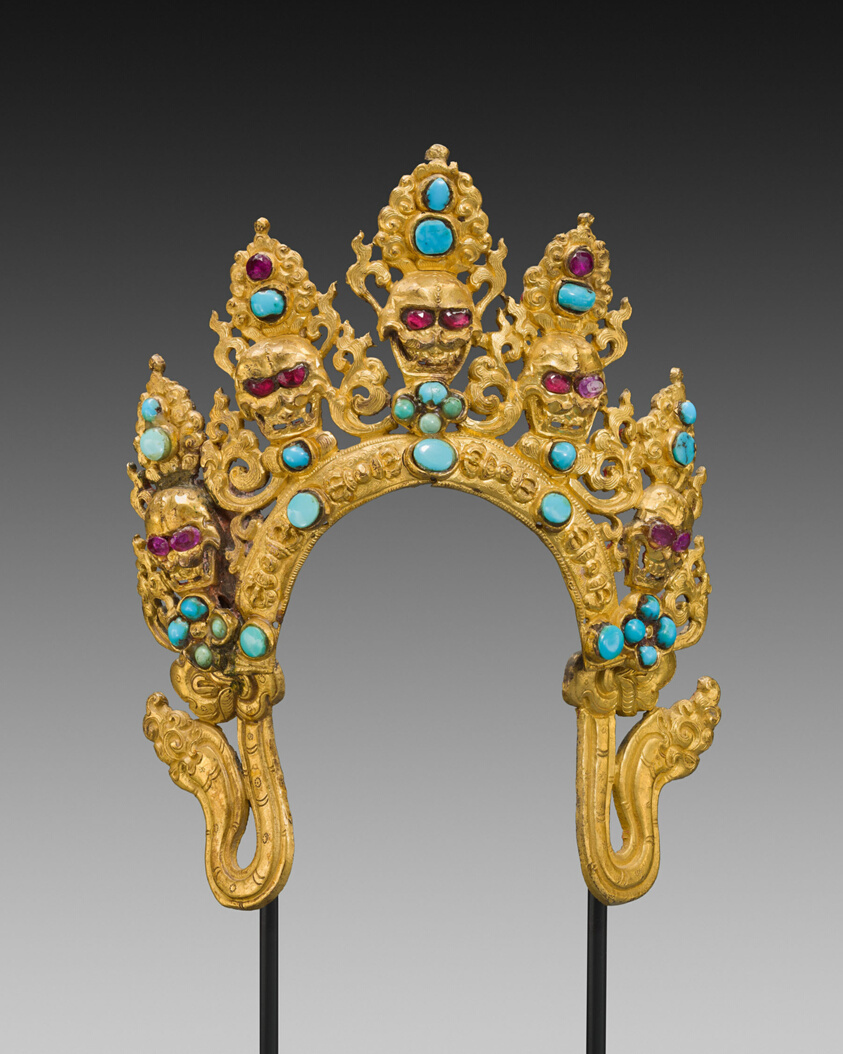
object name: Costume and Accessories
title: Crown for a Statue of Mahakala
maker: Tibet or Nepal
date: 16th–17th century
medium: Gilt copper inlaid with turquoises and glass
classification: costume